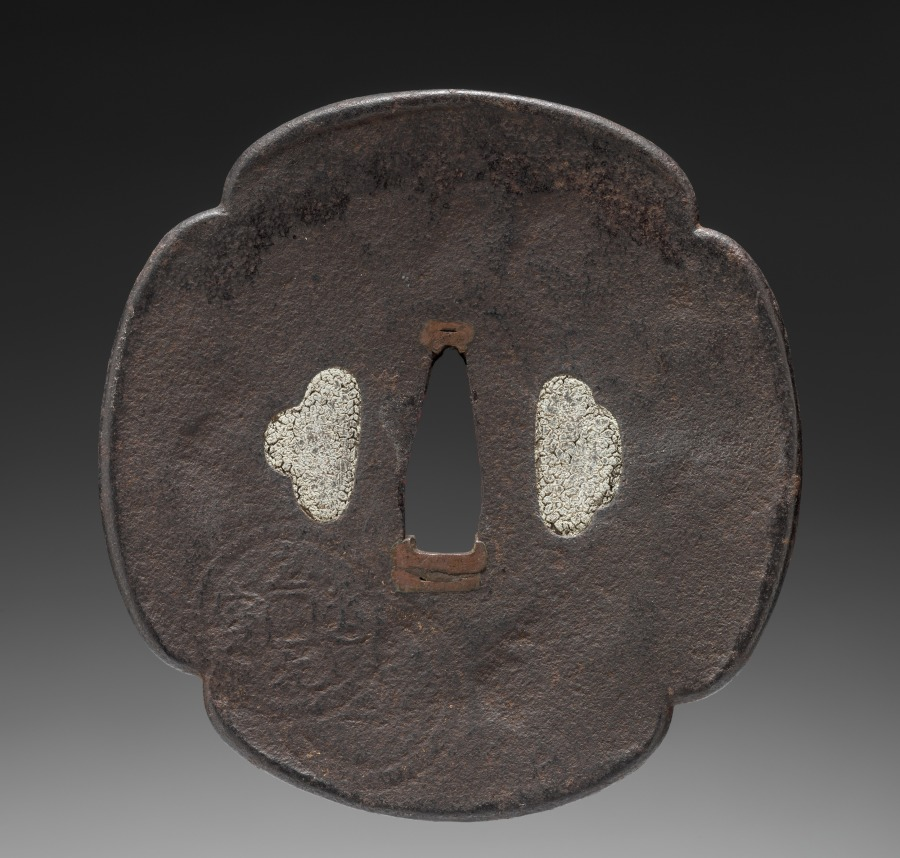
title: Sword Guard (Tsuba) with Coins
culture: Japan, possibly Edo period (1615-1868)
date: c. 1615–1868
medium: iron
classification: Arms and Armor